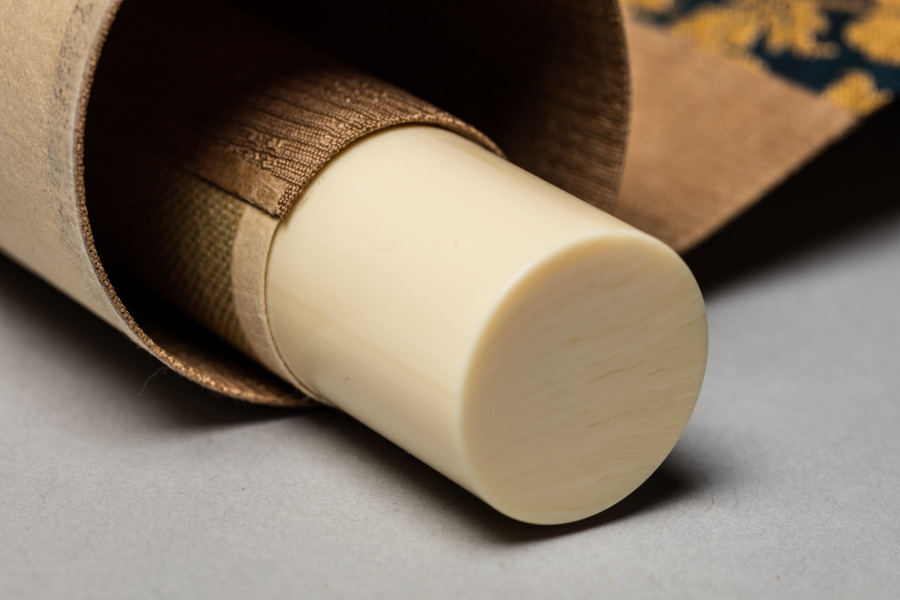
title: Squirrel on a Pine Branch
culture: China, Ming dynasty (1368–1644)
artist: Song Tian (Chinese, active 1300s)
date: 1500s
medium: hanging scroll, ink on paper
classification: Painting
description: This painting captures a squirrel in action, distracted and twisting its head while climbing and looking at a little bug to the right. The painter skillfully employs a combination of ink washes and fine brushstrokes to simulate the animal’s fur. Only three simple curved lines depict the squirrel’s claws. The subject of squirrels did not appear in Chinese painting before the late Southern Song (1127–1279) and Yuan periods (1279–1368). The painter Songtian was one of the few Yuan painters who specialized in this theme.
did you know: Although the evergreen pine does not indicate a time of year, the lively activity of the squirrel and the insect suggest a warm season.